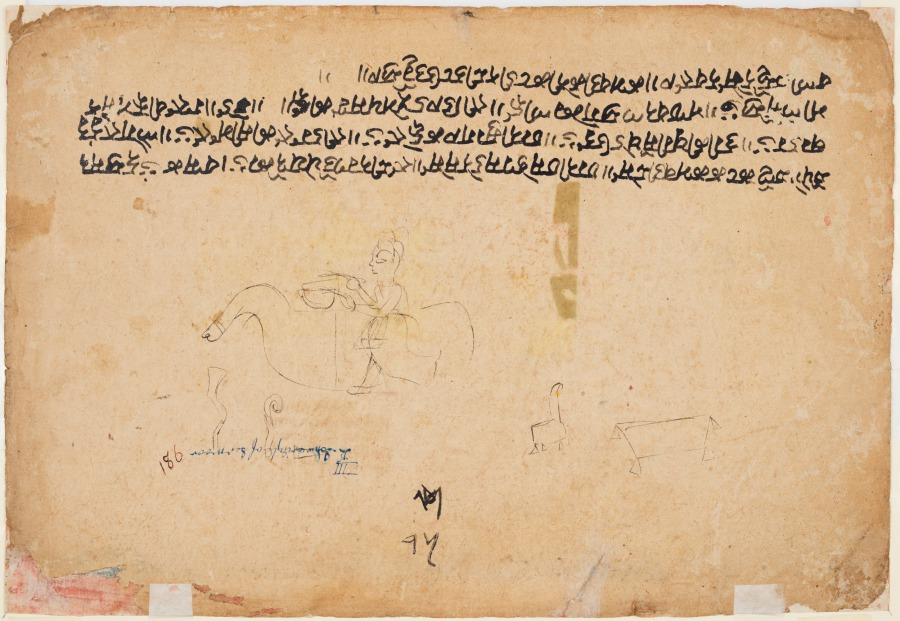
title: King Vikrama summons Madhava, folio 15 from a Madhavanala-Kamakandala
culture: Northern India, Pahari kingdoms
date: c. 1720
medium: gum tempera and gold on paper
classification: Painting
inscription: Roman numeral: VIII K. Iswari Singh of Sirmoor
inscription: caupai. calio kataka kāmavatī desā. dharati dhase bhāra sahe na sesā. jā dīna gayī to peyano kāī. dāsa kayi digapatī baraharaī. tarī kī khurī so kheī udāī. dharatī suraga eka ho jāī. jīha rājā ki sima jaī. le gaja danda milāī so āī. mādhavanala āge kar līā. jīhī eha prema pasarā kiyā. dohā. rājā bīkramaseṃna valī uhane sāna bajāe. kāmavatī ke nīkata īha nadī taṭa utari jvāe.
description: Having arrived at the border of his enemy’s kingdom, Madhava’s ally, King Vikrama, encamps by the riverbank. A crown and subtle halo behind his face testify to his righteousness. Separated from his beloved, Madhava has become so miserable that he has been unable to eat. Clutching his vina (stringed instrument), he converses with the king about how to accomplish his reunion with Kamakandala. The king promises to bring them back together.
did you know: Madhava is depicted in an emaciated form unlike his other representations in the manuscript.